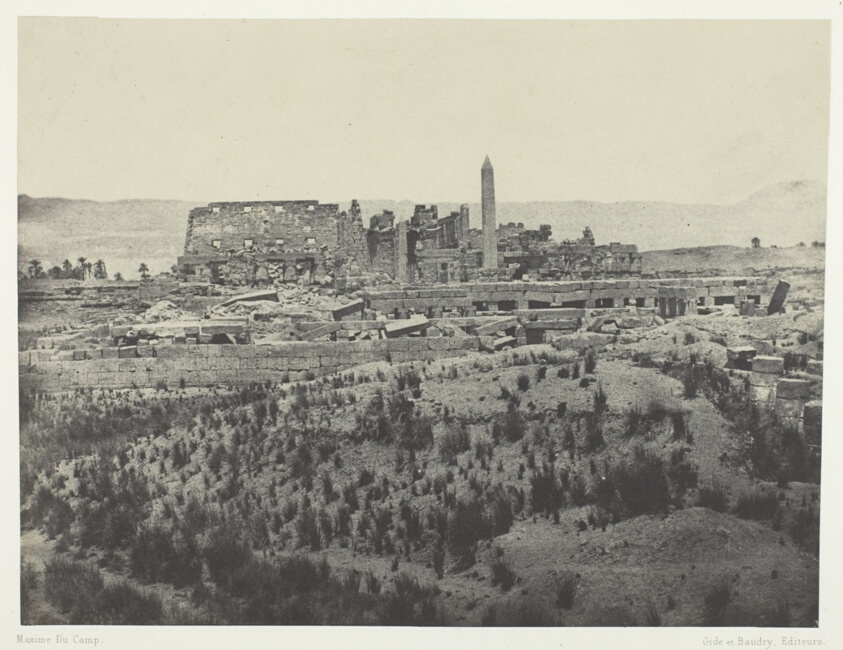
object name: Photograph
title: Palais de Karkak, Vue générale des Ruines, Prise a l'est; Thèbes, plate 31 from the album "Egypte, Nubie, Palestine et Syrie" (1852)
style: 19th century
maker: Maxime Du Camp (French, 1822–1894)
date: 1849/51, printed 1852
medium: Salted paper print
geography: France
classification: salted paper print; photographic process; photography; photograph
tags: Collected by Hugh Edwards, Egypte, Nubie, Palestine et Syrie